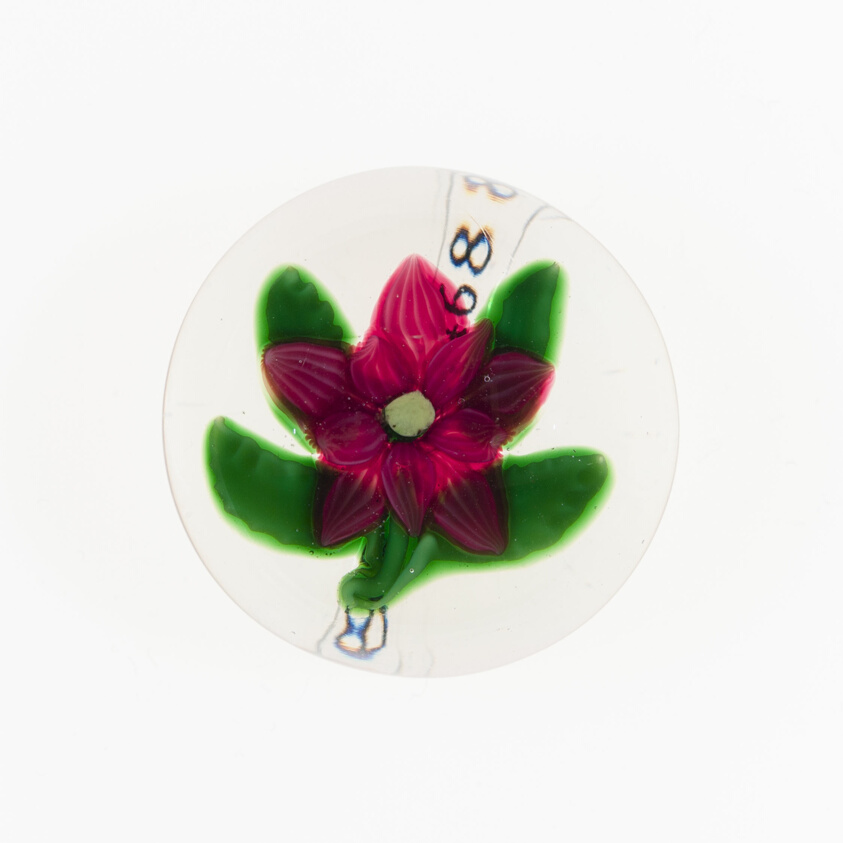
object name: Glass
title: Paperweight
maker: Saint-Louis Glassworks (Cristalleries de Saint-Louis); Lorraine, France, founded 1586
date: 19th century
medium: Glass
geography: Saint-Louis-lès-Bitche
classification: paperweight; glass